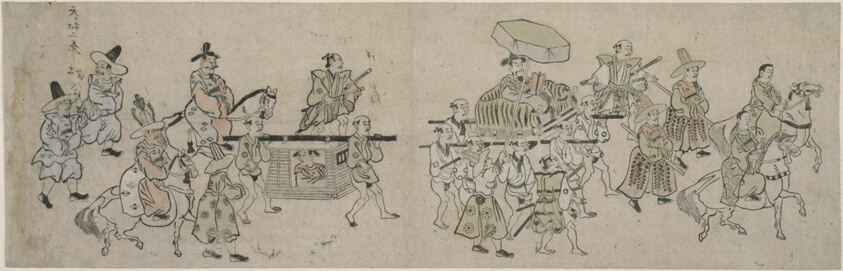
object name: Print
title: Korean Embassy Parade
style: Japanese (culture or style)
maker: Attributed to Hishikawa Moronobu; Japanese, (?)-1694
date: 1682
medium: Hand-colored woodblock prints; makimono-e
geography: Japan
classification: woodblock print; print; asian art